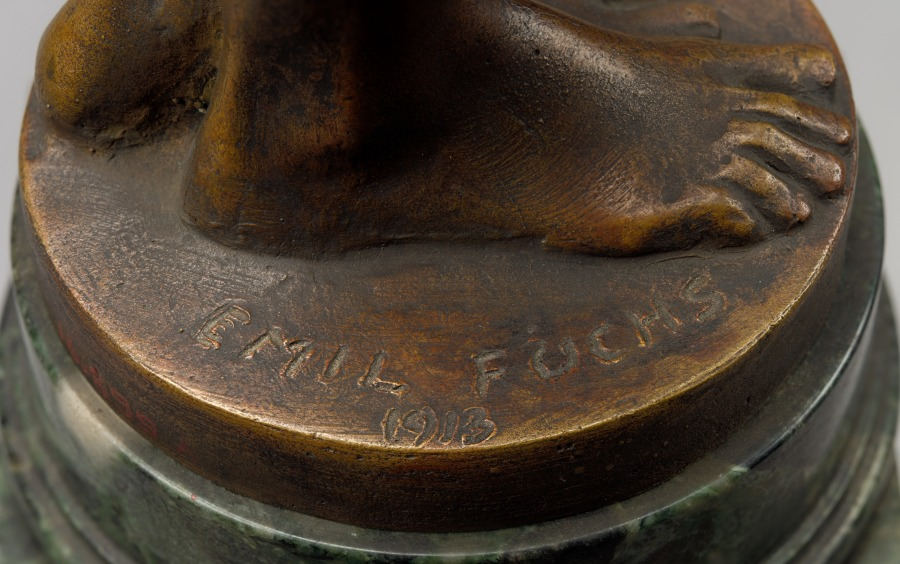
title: Eva, Study of a Nude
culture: America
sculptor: Emil Fuchs (American, born Austria, 1866–1929)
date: 1913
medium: bronze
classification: Sculpture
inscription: Signed on base: EMIL FUCHS 1913